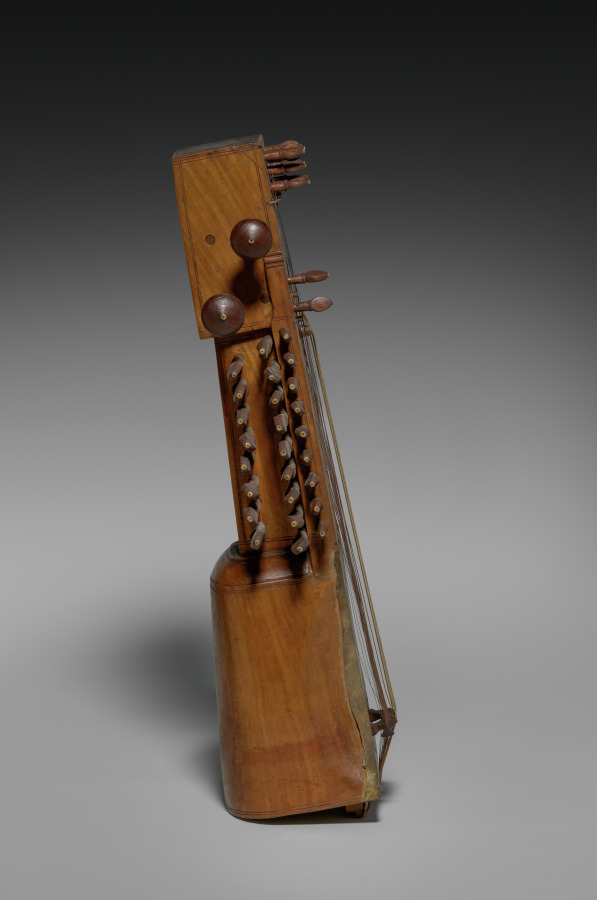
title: Sarangi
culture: India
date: 1800s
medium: Wood, parchment, bone or ivory, wood inlays, gut, and copper strings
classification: Musical Instrument